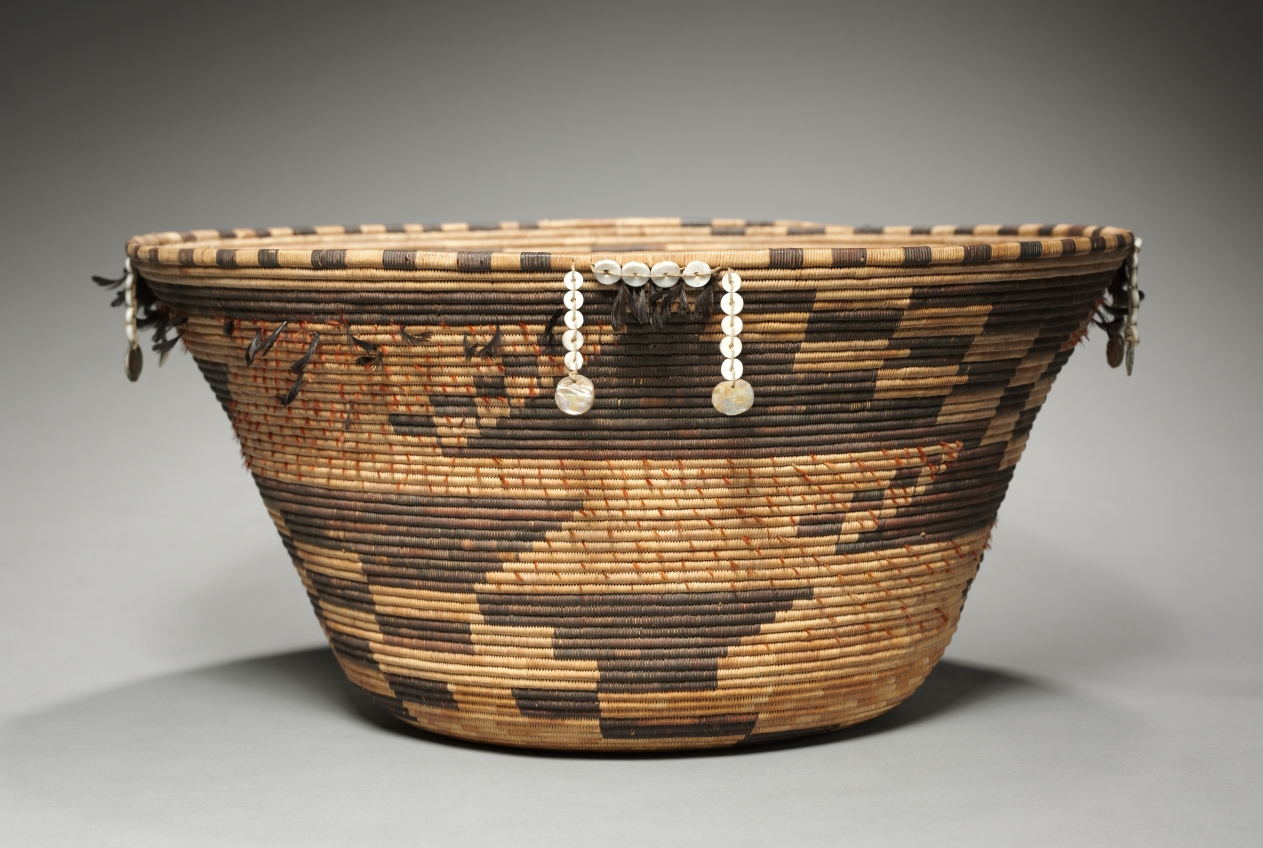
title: Puberty Basket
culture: California, Pomo, late 19th century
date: 1890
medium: coiled, quail and woodpecker feathers, shell, abalone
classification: Basketry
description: This finely woven basin is based on a traditional form that young Pomo women used to wash themselves after ceremonial seclusion following their first menses. The example on display, however, was made for the outside market.